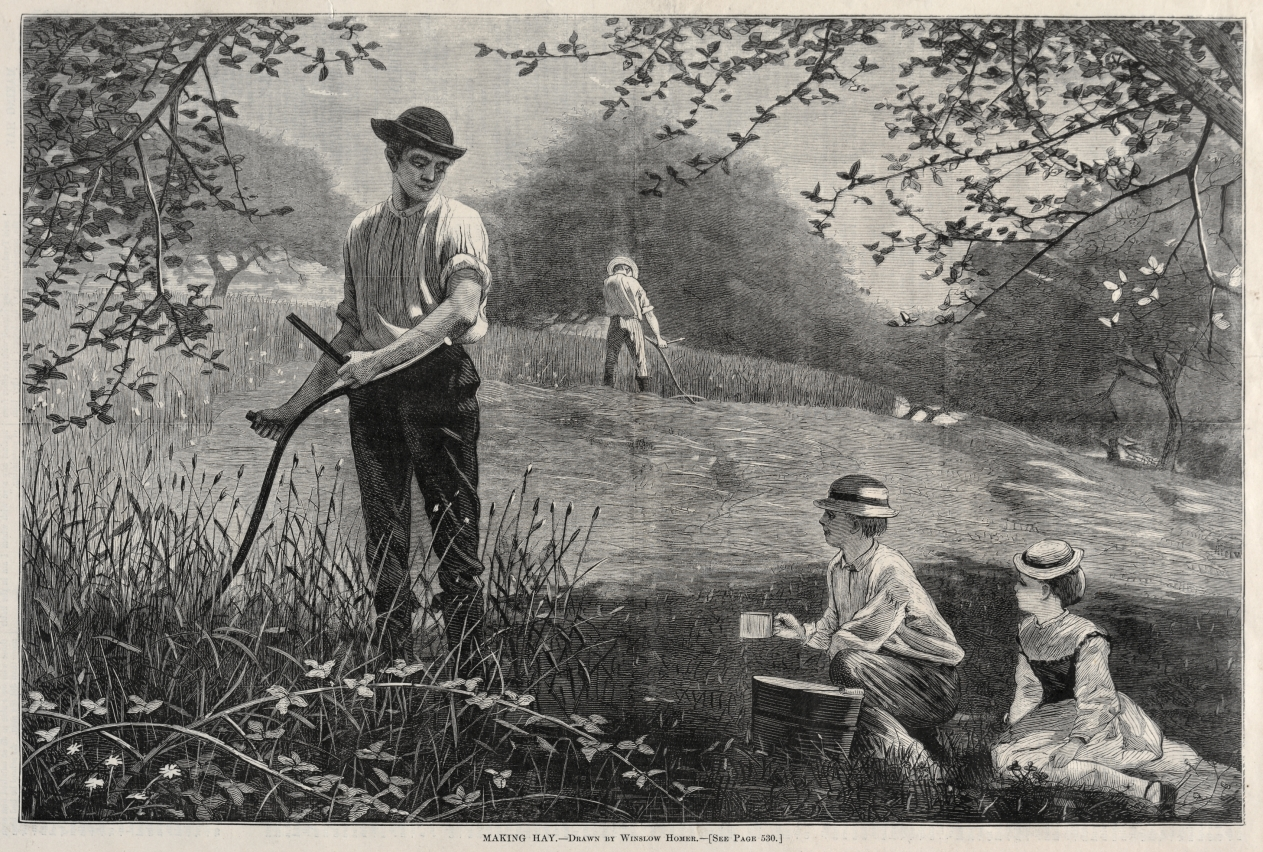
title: Making Hay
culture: America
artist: Winslow Homer (American, 1836–1910)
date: 1872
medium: wood engraving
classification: Print